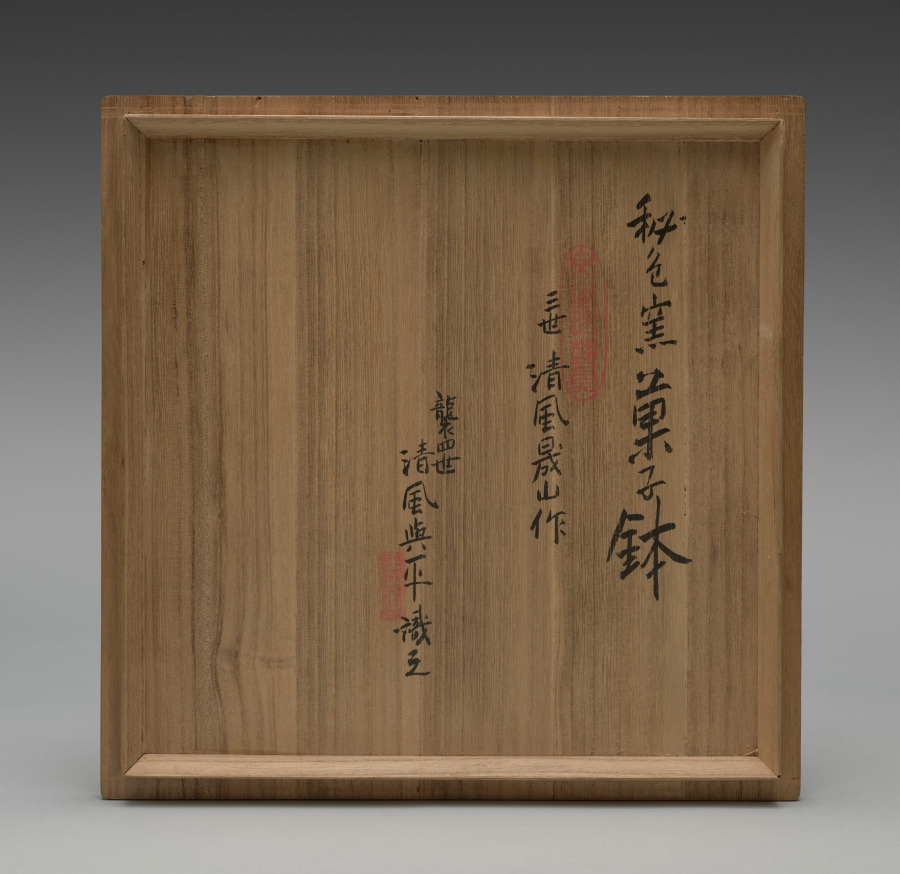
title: Sweets Bowl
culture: Japan, Meiji period (1868–1912)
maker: Seifū Yohei III (Japanese, 1851–1914)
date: 1893–1914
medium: Porcelain with green glaze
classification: Ceramic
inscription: 彫銘：清風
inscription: 共箱の箱書：（蓋裏）秘色窯菓子鉢 三世清風晟山作（印：帝室技藝員）襲（袭）四世清風與平識之（印：清風）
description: The box for this sweets bowl has an attestation by Yohei IV that it is a work by Yohei III and in the hisokuyō (C. mise yao), or “mysterious color ware,” style. In fact, as actual examples of mise ware were unknown in Yohei III’s time, he would have associated the color with the green-glazed ceramics of kilns at Longquan, also in Zhejiang Province, produced during the Yuan dynasty.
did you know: Many ceramics created by the Seifū Studio refer to and emulate Chinese ceramics in form and glazing.